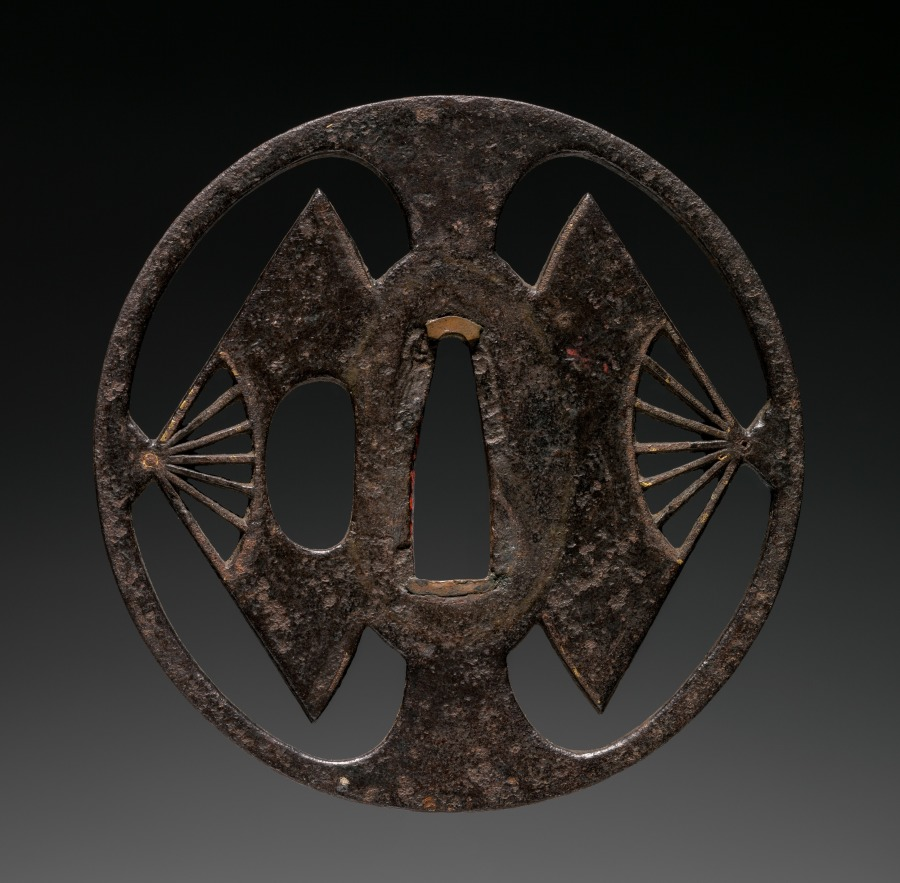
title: Sword Guard (Tsuba) with Fans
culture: Japan, Edo period (1615–1868)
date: 1615–1868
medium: iron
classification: Arms and Armor